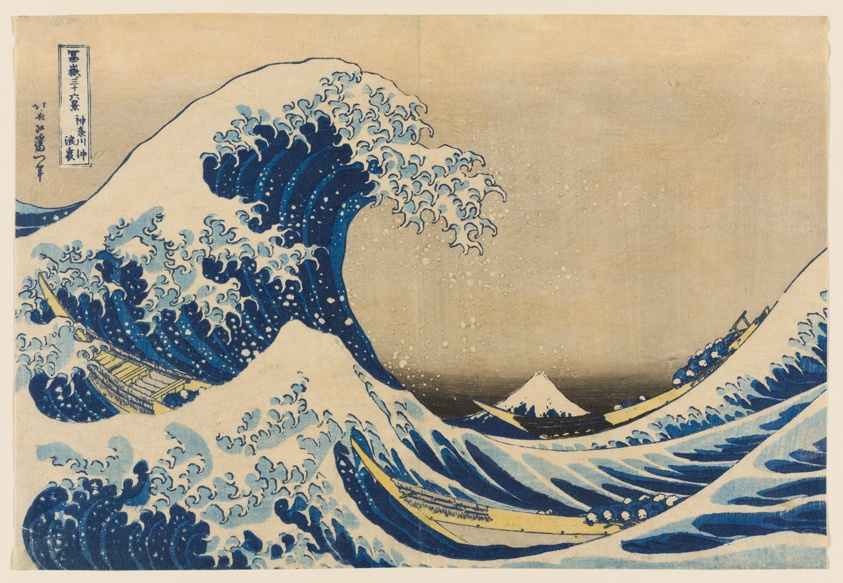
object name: Print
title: Under the Wave off Kanagawa (Kanagawa oki nami ura), also known as The Great Wave, from the series "Thirty-Six Views of Mount Fuji (Fugaku sanjurokkei)"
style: Japanese (culture or style)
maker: Katsushika Hokusai 葛飾 北斎; Japanese, 1760-1849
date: 1830/33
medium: Color woodblock print; oban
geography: Japan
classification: woodblock print; print; asian art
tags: water, waves